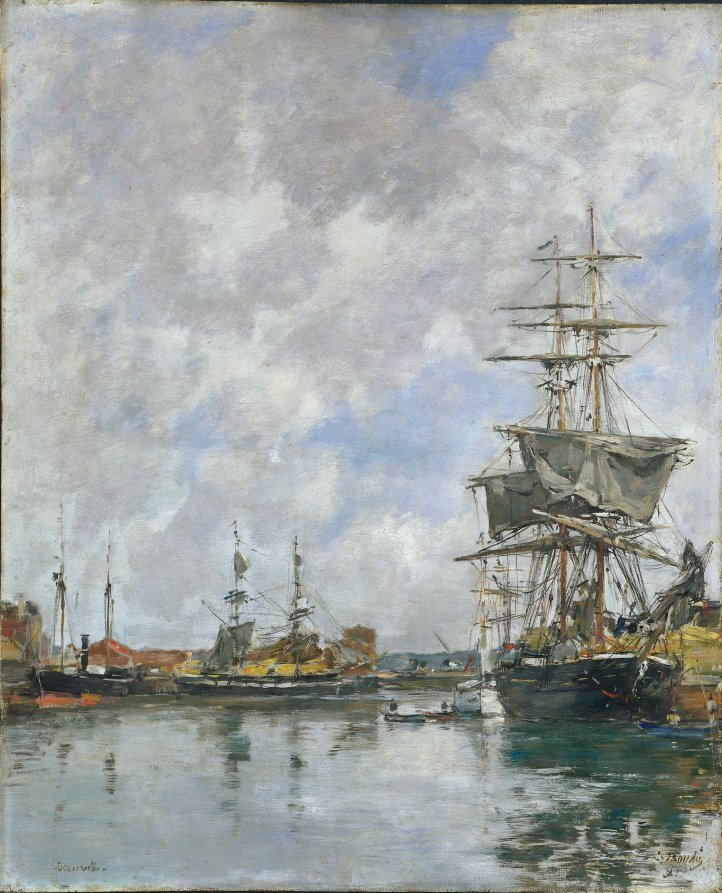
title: The Dock of Deauville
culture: France, 19th century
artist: Eugène Boudin (French, 1824–1898)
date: 1891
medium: oil on wood panel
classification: Painting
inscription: Signed lower right: E. Boudin / 91 Inscribed lower left: Deauville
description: This painting treats a common theme in Eugène Boudin's mature art: ships at harbor. Boudin typically did not depict the busy commercial life or human tasks related to ships; rather, he seemed always to strive for an overall mood of calm, harmony, and light. Although Boudin's brushwork was quite sketchy at this time, he was still able to suggest the complex sails and structures of large vessels. Here he rubbed light tones around the ships' masts, often overlapping the darker lines of the wood and rigging with white or gray tones as if to evoke the passing wind and shifting positions common to nautical life.